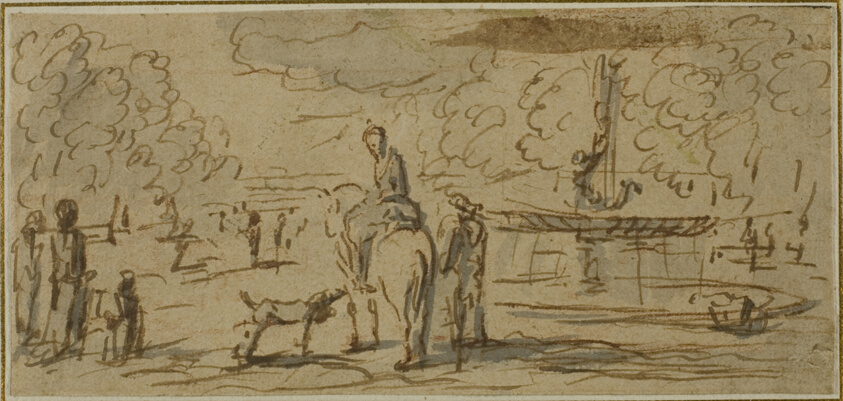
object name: Drawing and Watercolor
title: Figures Walking and on Horseback in a Park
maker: French School (18th century)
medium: Pen and brown ink and gray wash on tan laid paper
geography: France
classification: pen and ink drawings; drawings (visual works); prints and drawing